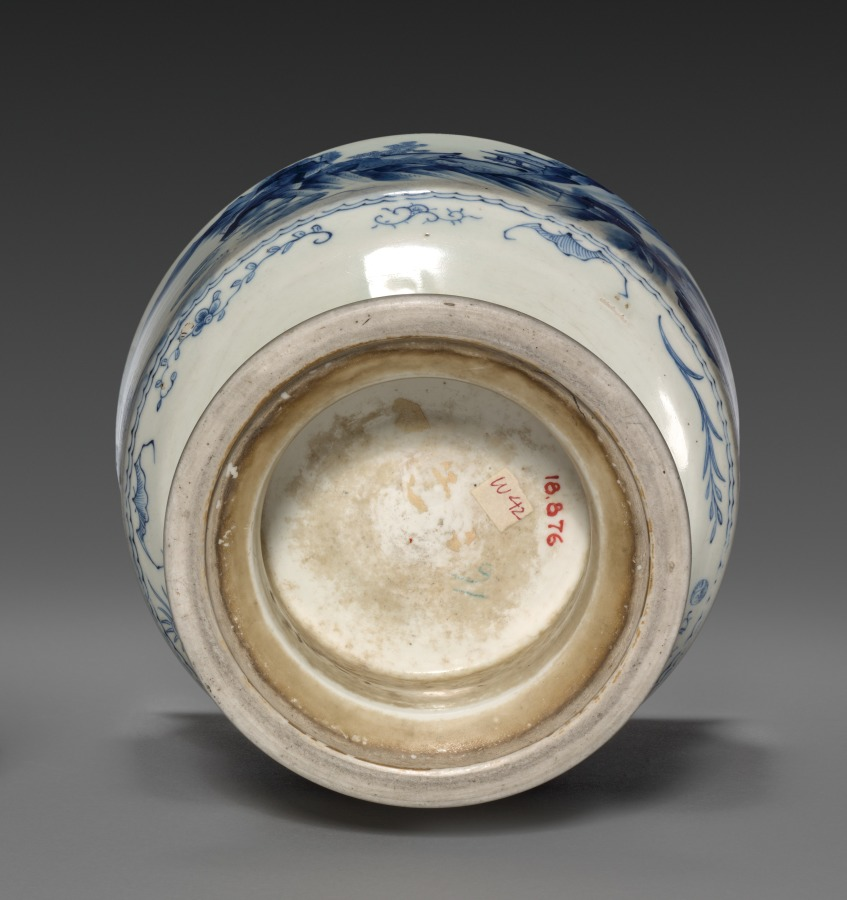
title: Jar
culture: Japan, Edo period (1615–1868)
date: early to mid-1800s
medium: porcelain with underglaze blue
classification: Ceramic